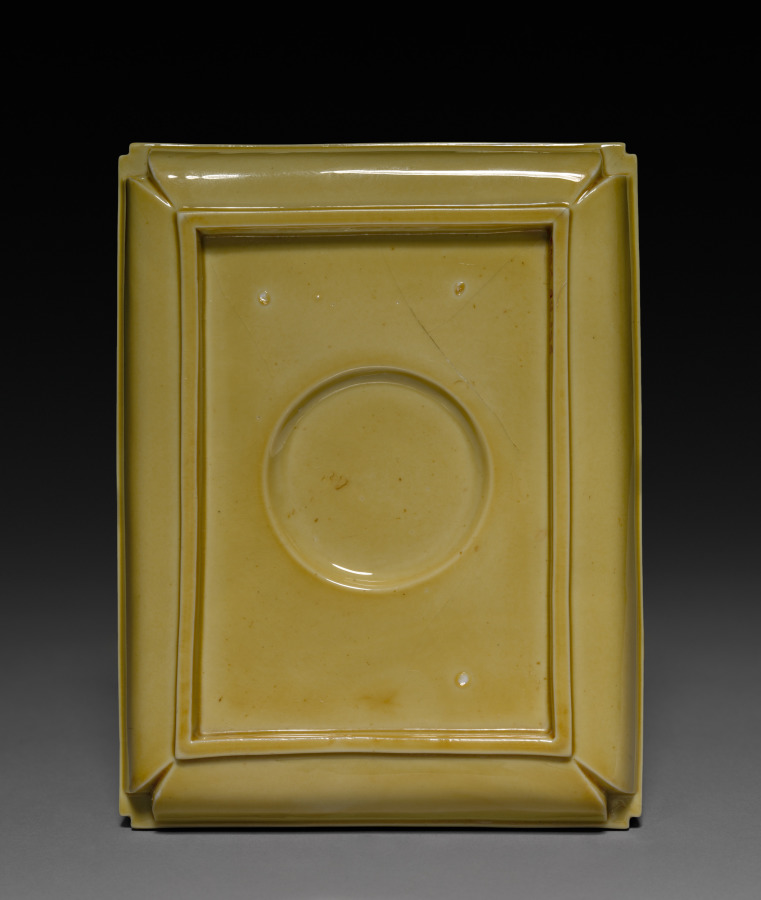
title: Cup Stand with Dragons in Waves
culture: China, Jiangxi province, Jingdezhen kilns, Qing dynasty (1644-1911), Kangxi reign (1662-1722)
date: 1662–1722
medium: porcelain with molded decoration and yellow glaze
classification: Ceramic